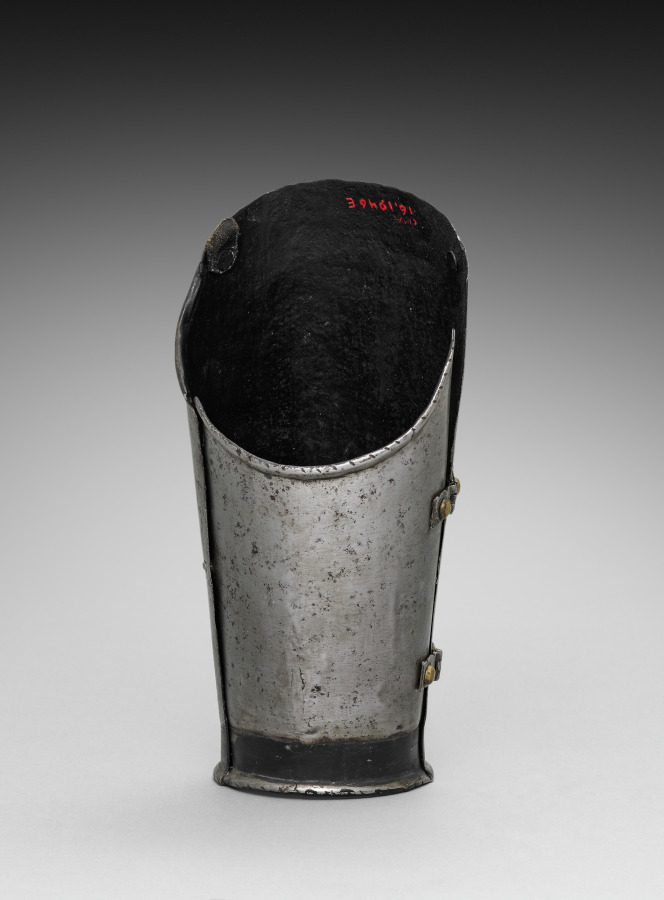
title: Left Vambrace (lower cannon)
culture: Germany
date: c.1550–1570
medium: iron, steel, leather and brass rivets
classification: Arms and Armor